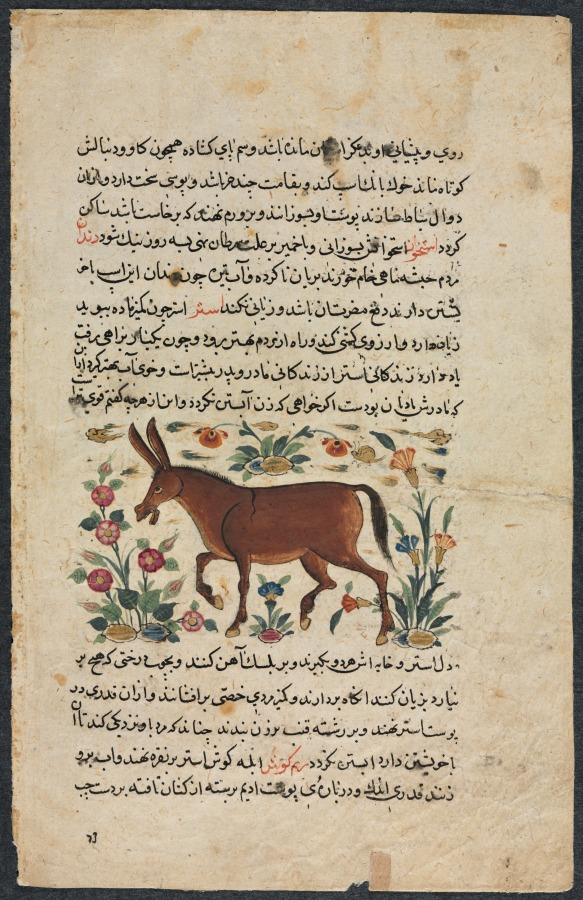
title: Text Page, Persian Prose (Recto); Khar (Ass) (Verso)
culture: Iran, Timurid Period, 15th century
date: 1400s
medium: ink and opaque watercolor on paper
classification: Manuscript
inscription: script: Naskh